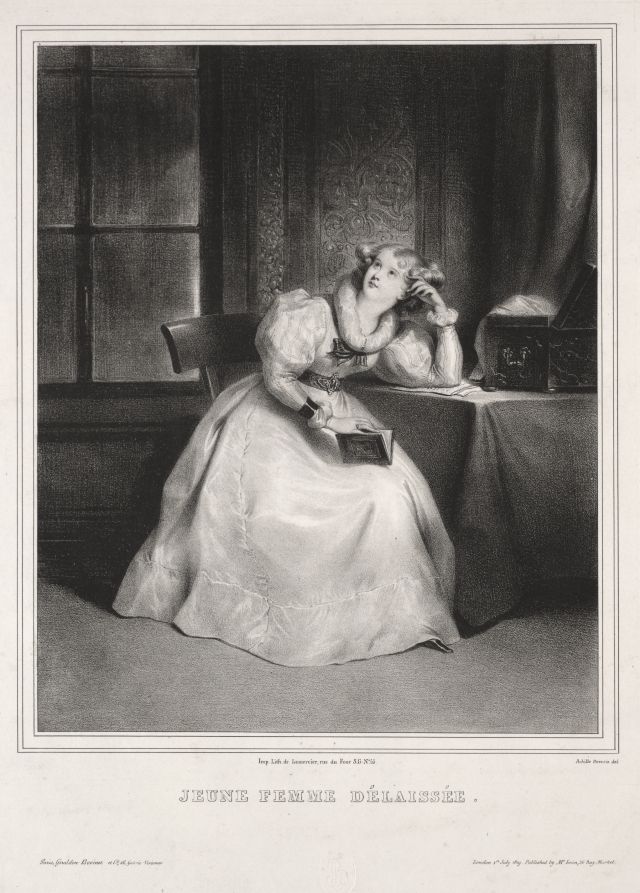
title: Reverie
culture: France, 19th century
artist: Achille Devéria (French, 1800–1857)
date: c. 1830–49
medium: lithograph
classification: Print